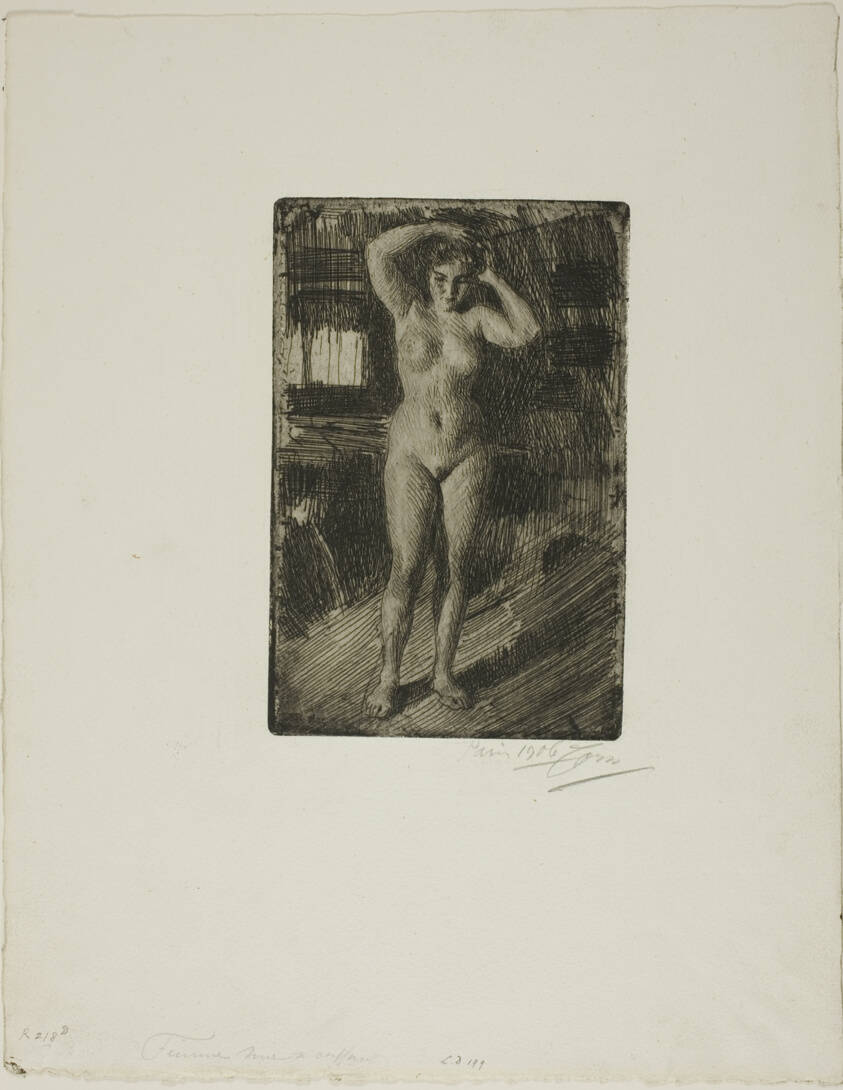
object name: Print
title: Anna Doing Her Hair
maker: Anders Zorn (Swedish, 1860-1920)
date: 1906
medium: Etching on ivory laid paper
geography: Sweden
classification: etching; print; prints and drawing